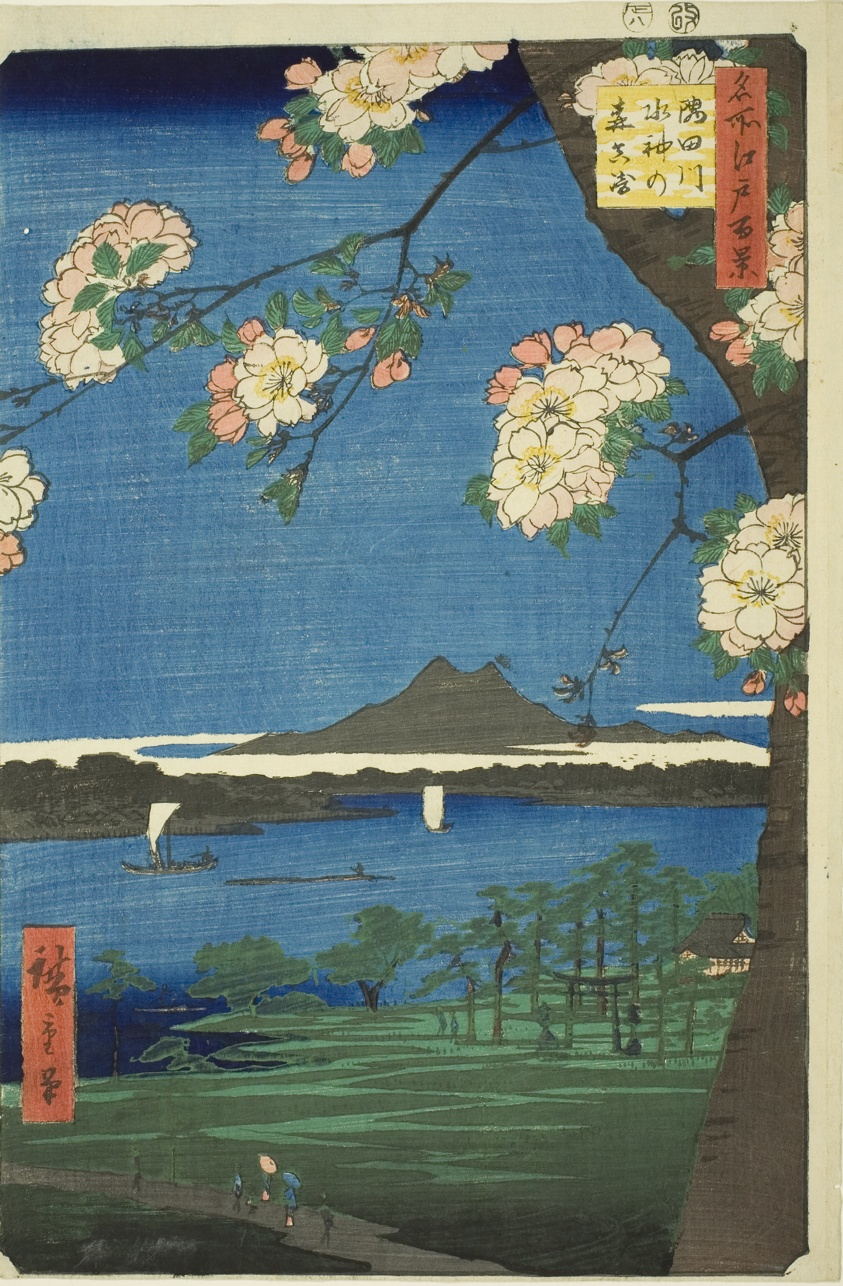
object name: Print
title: Suijin Shrine and Massaki on the Sumida River (Sumidagawa Suijin no mori Massaki), from the series "One Hundred Famous Views of Edo (Meisho Edo hyakkei)"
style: Japanese (culture or style)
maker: Utagawa Hiroshige 歌川 広重; Japanese, 1797-1858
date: 1856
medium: Color woodblock print; oban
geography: Japan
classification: woodblock print; print; asian art